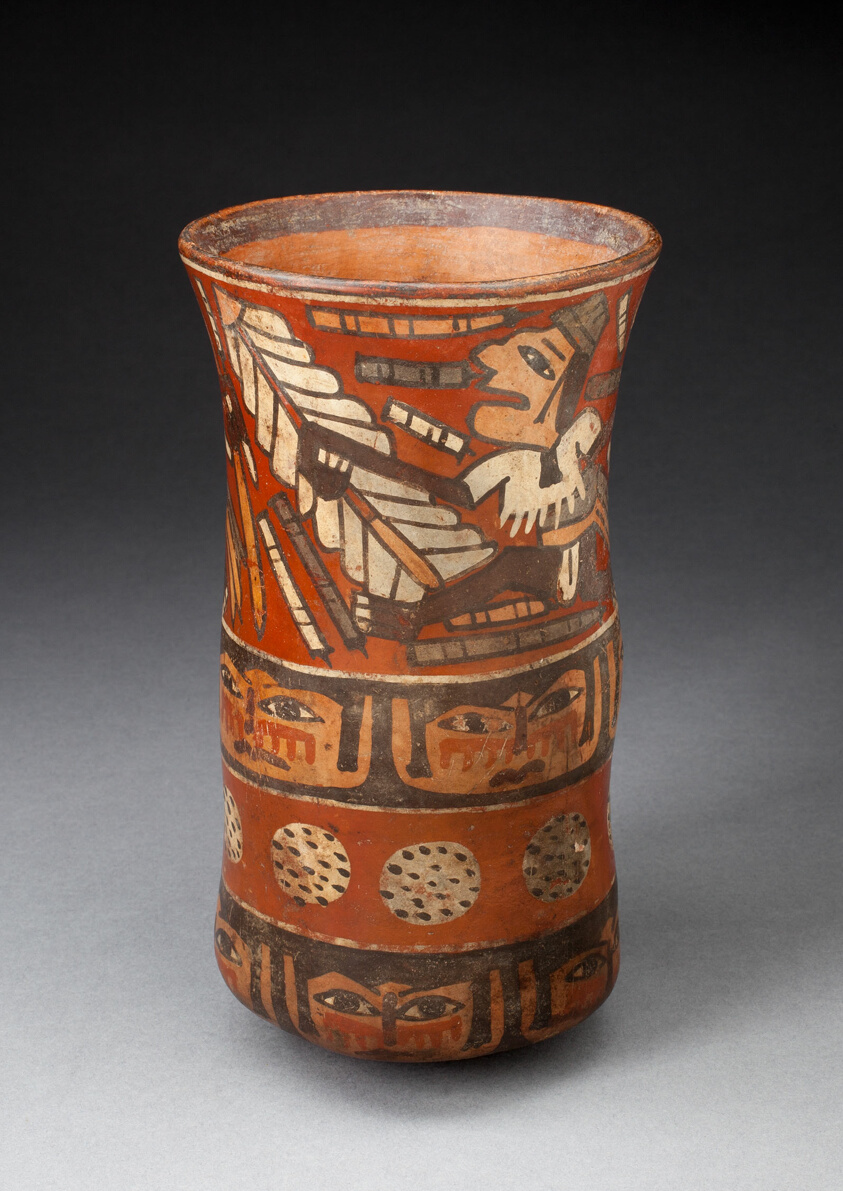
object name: Vessel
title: Beaker Depicting Rows of Figures with Weapons and Band of Human Faces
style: nazca, early intermediate period, Pre-Columbian, americas, Arts of the Americas, andean, andes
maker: Nazca; South coast, Peru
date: 180 BCE–500 CE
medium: Ceramic and pigment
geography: Peruvian South Coast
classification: earthenware; ceramics; vessel; art of the americas